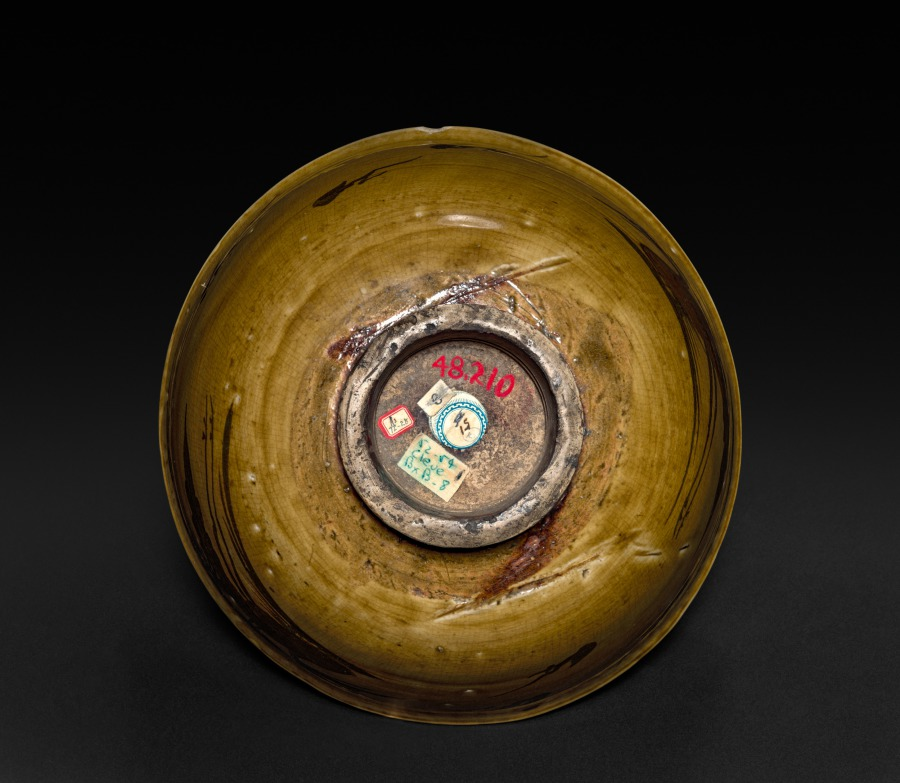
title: Bowl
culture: China, Ming dynasty (1368–1644)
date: 1368–1644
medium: stoneware, Cizhou ware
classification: Ceramic